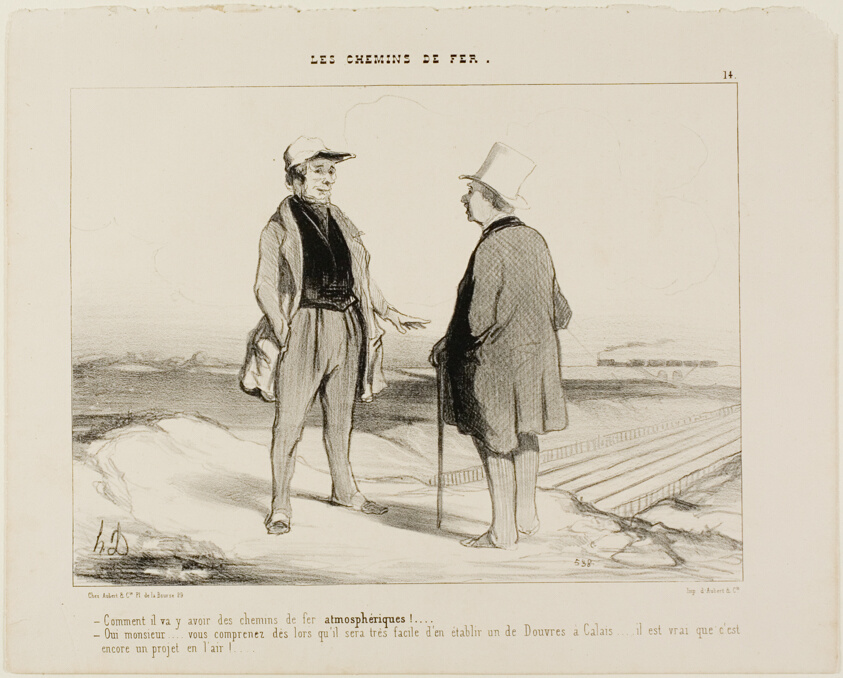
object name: Print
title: “- What do you mean, there are soon going to be air trains? - But of course, Monsieur... you see, it will then be very easy to establish a connection between Dover and Calais... but of course, the project is still suspended in air,” plate 14 from The Railroad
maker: Honoré Victorin Daumier; French, 1808-1879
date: 1843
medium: Lithograph in black on ivory wove paper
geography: France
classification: lithograph; print; prints and drawing